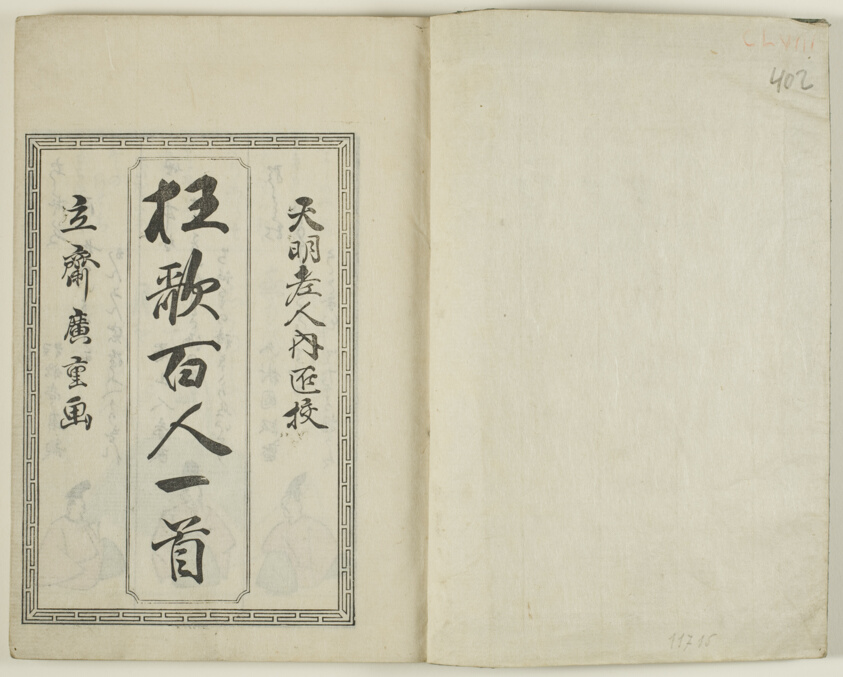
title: Kyoka hyakunin isshu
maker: Utagawa Hiroshige (1797-1858); Japanese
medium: Woodblock printed book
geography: Japan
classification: book; asian art